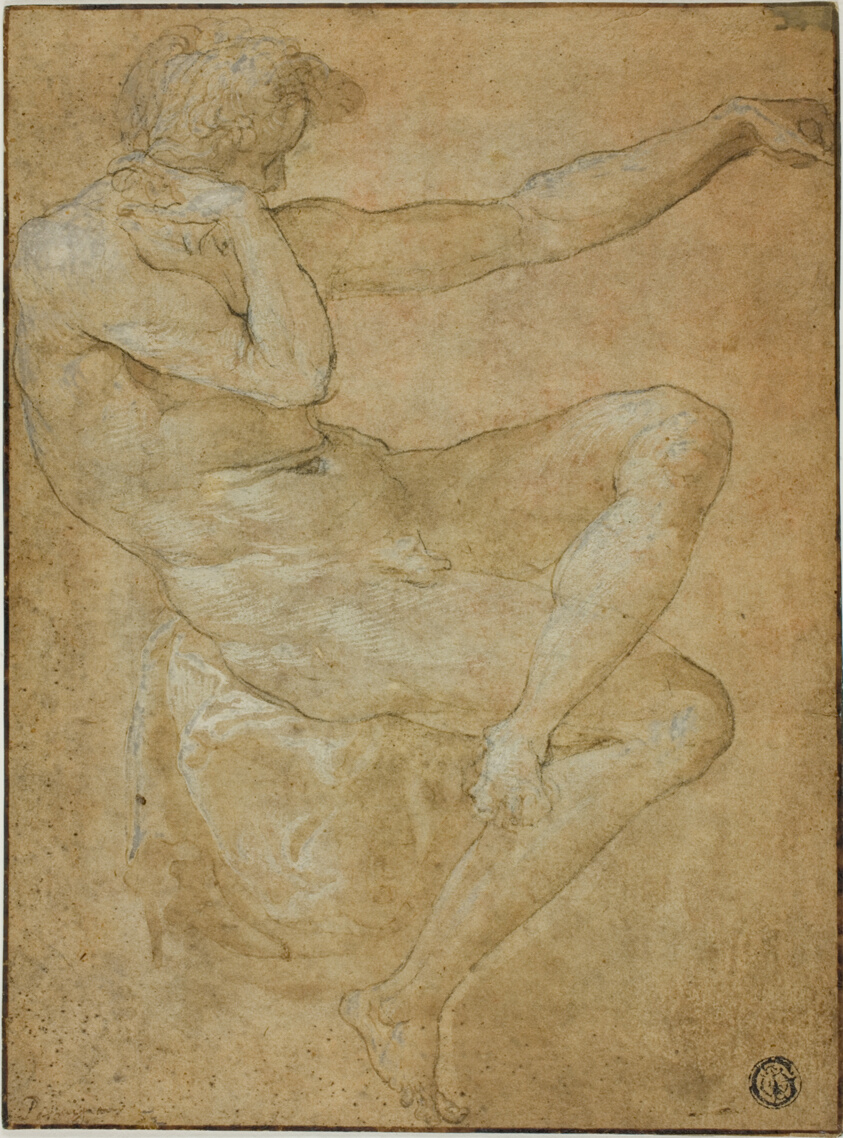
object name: Drawing and Watercolor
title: Seated Male Nude with Outstretched Left Arm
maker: Unknown Artist (Italian, late 16th century); or possibly after Domenico Beccafumi, called Il Mecarino (Italian, 1484-1551); or possibly Imitator of Francesco Salviati (Italian, 1503-1540); or possibly Pellegrino Tibaldi (Italian, 1527-1596); or Style of Francesco Primaticcio (Italian, 1504-1479)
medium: Pen and brown ink with brush and brown wash, heightened with lead white (partly oxidized), with additions of black chalk, on tan laid paper, laid down on oatmeal wove paper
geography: Italy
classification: ink with wash; drawings (visual works); prints and drawing